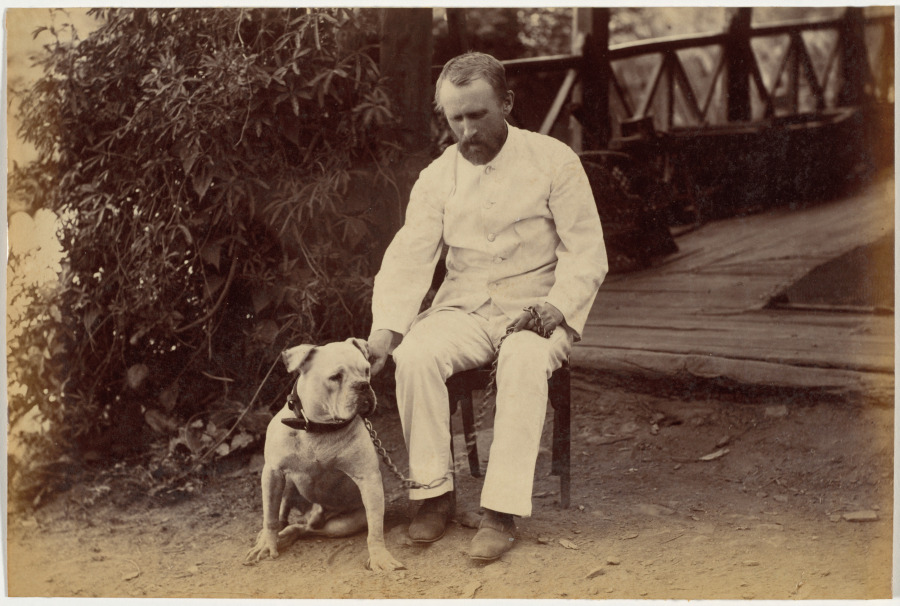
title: Robert Hotz Esquire and Bulldog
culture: India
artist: Raja Deen Dayal (Indian, 1844–1905)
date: 1887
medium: albumen print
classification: Photograph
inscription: Stamped in black ink on verso: “19.G.7”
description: Robert Hotz (1844–1923), a professional photographer with studios in Calcutta and Shimla, poses with his bulldog, a breed that had symbolized England since the 1700s. Many British people came with or imported dogs to India. The British relied on their Indian servants to walk, feed, and care for the animals. Before the British arrived, Indian people rarely kept dogs as pets. Historically, in Indian art, dogs and jackals were associated with cremation grounds and were not folded into scenes of domestic life.